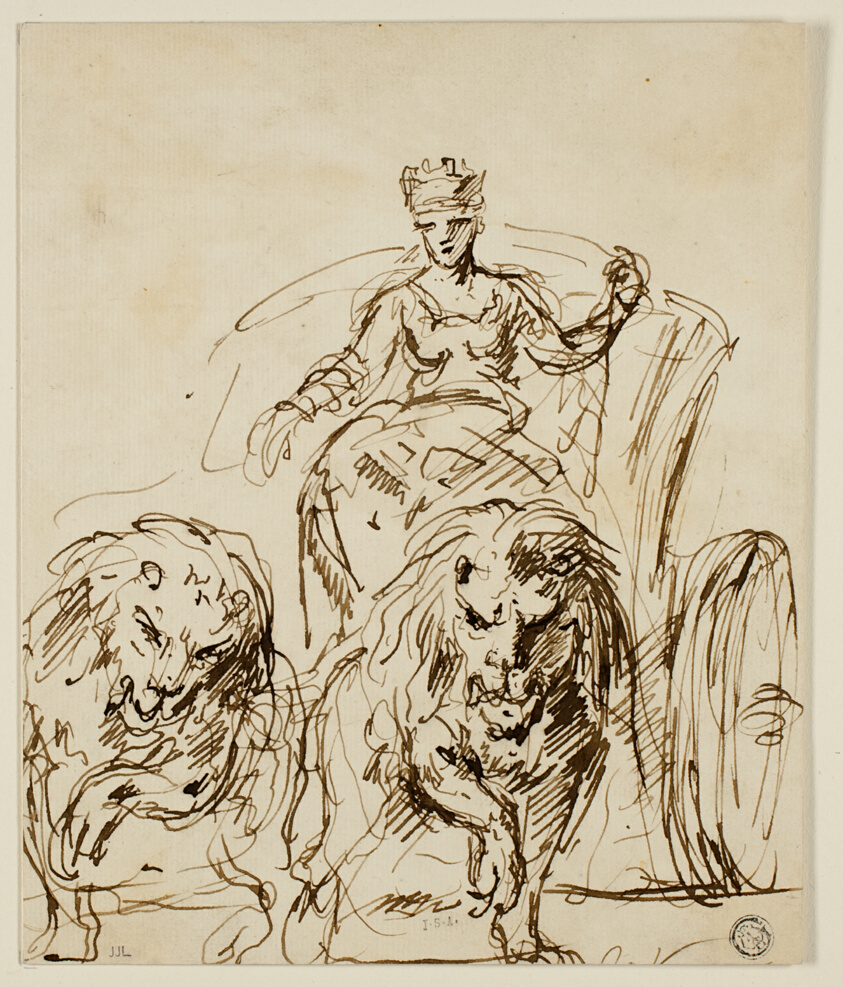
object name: Drawing and Watercolor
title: Cybele on Chariot Drawn by Lions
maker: John Vanderbank (English, 1686-1739)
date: c. 1738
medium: Pen and brown ink, on cream laid paper, laid down on card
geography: England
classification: pen and ink drawings; drawings (visual works); prints and drawing